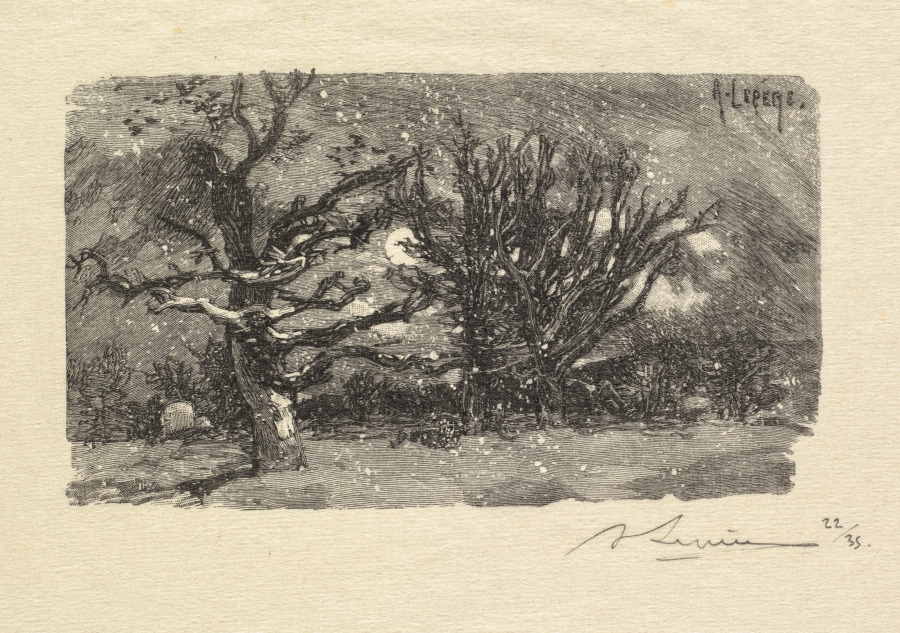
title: Fontainebleau Forest: Au dormoir de Lantara (La Forêt de Fontainebleau: Au dormoir de Lantara)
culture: France, 19th century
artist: Auguste Louis Lepère (French, 1849–1918)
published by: A. Desmoulins, Published in Revue Illustrée, 1887–90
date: 1890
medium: wood engraving from bound volume of 34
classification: Bound Volume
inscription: In block, upper right: A. LEPÈRE; below image, lower right, in black ink: ALepère 22/35; on window mat, lower right, in graphite: Au dormoir de Lantara